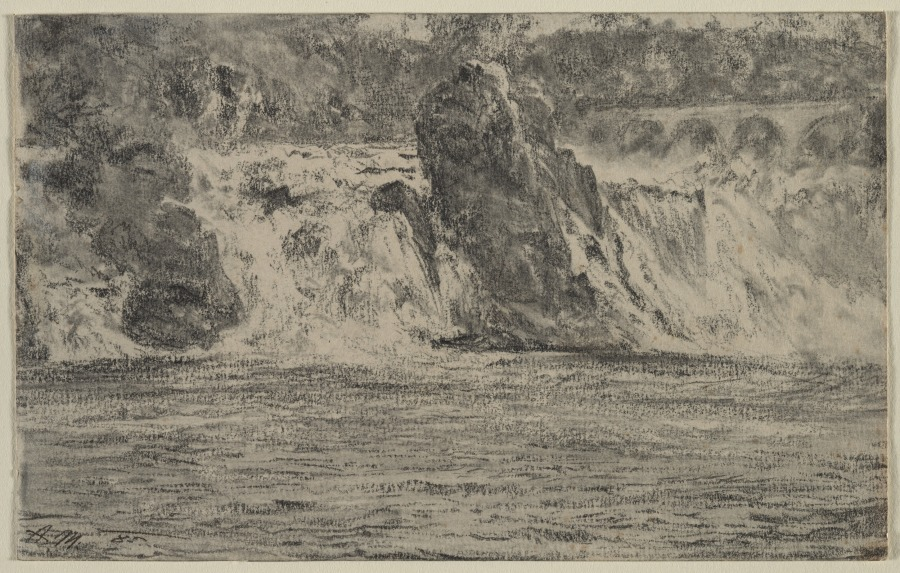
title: Falls of the Rhine at Schaffhausen (Rheinfall von Schaffhausen)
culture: Germany, 19th century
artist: Adolph von Menzel (German, 1815–1905)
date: 1885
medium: graphite, with stumping (traces of white paint, along left edge, unrelated to composition)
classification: Drawing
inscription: signed, lower left, in graphite: A M. 85 [line over 85] ; verso, upper right, in graphite(?): 12-197 ; by artist(?), lower left, in graphite: Schaffhausen [partially skinned]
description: Menzel was one of the most celebrated and prolific painters in Germany during the 19th century. A meticulous draftsman, he executed detailed drawings in preparation for each of his paintings. Thousands of the artist’s notebook studies have survived. Many of them were studies of heads, half-figures, and landscape vignettes to be incorporated into his paintings. This sheet depicting a waterfall and bridge shrouded in mist is an example of one of Menzel’s exquisite graphite studies.